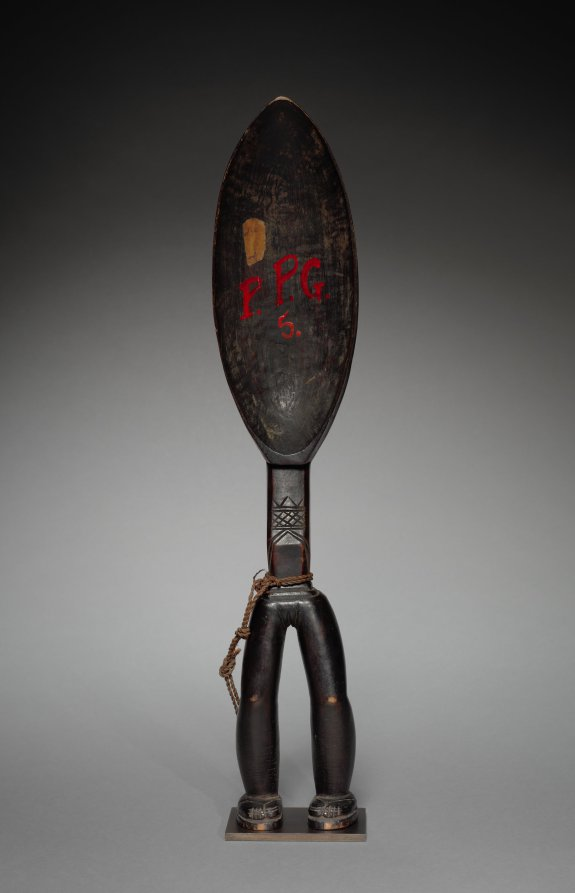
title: Ceremonial Ladle (Wunkirmian or Wakemia)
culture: Africa, West Africa, Côte d'Ivoire, Dan-style carver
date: possibly late 1800s or early 1900s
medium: Wood, twine, and possibly resin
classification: Sculpture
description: An emblem of great prestige, this human-shaped ladle would have been owned by a distinguished married woman recognized for her talents as a farmer and her exceptional generosity and hospitality. One of her responsibilities was to host a grand Feast of Merit when she, along with other highly respected women, prepared food for a large number of local and foreign guests. During the feast the women danced brandishing their rice-filled ladles while singing in strident voices.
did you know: This ladle was a status symbol for a notable woman.